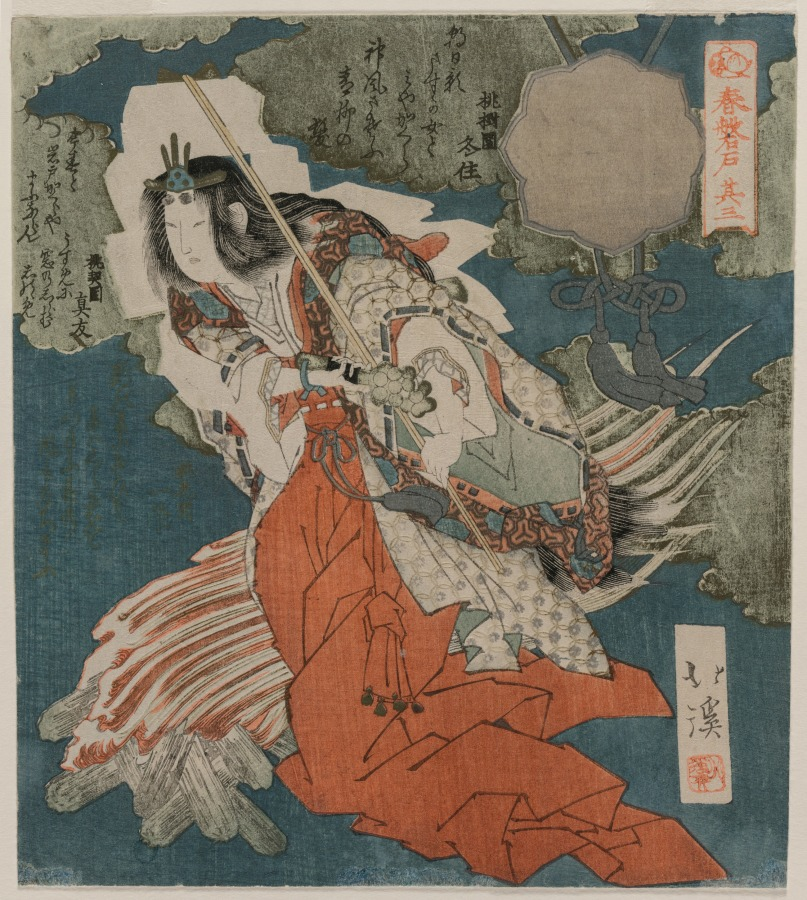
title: Uzume no Mikoto from The Cave Door of Spring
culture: Japan, Edo period (1615–1868)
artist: Totoya Hokkei (Japanese, 1780–1850)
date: 1825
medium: third from a pentaptych of woodblock prints; ink and color on paper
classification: Print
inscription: Signature: Hokkei Seal: Hokkei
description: These elegant surimono prints come from a set of five images inspired by the legend of the Shinto Supreme Sun Goddess, Amaterasu. She was once so offended by her brother that she retreated into a cave, leaving the earth in darkness. Several attempts to lure her out with cocks crowing, music-making, and a goddess dancing failed, but a mirror hung from a nearby tree made Amaterasu curious, bringing her to the entrance of the cave. A stone was quickly placed at the entrance to block her way back into the cave, and light was restored to the world. Each print is set against a blue evening sky with embossed clouds enriched with gold, silver, and copper.